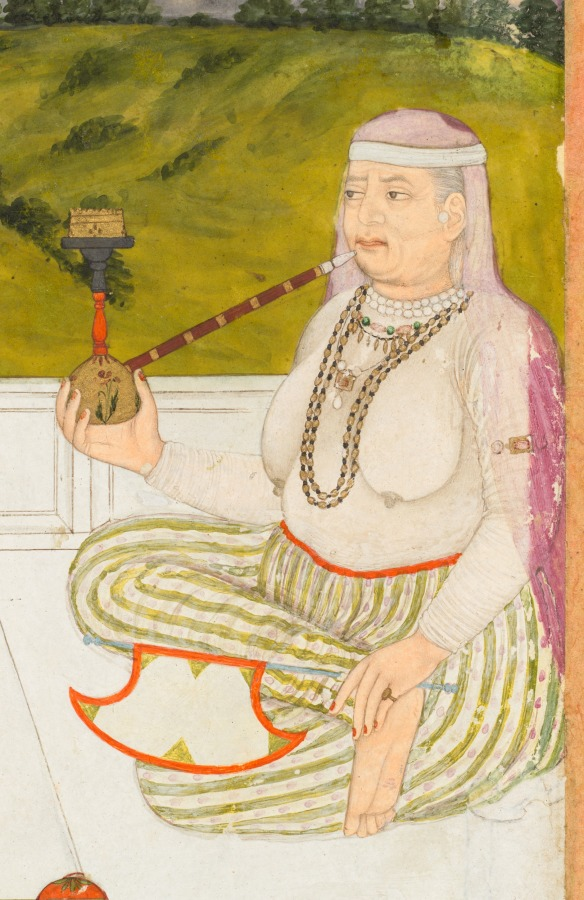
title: A princess reclining on a terrace with attendants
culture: India, Mughal, 18th century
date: c. 1730–1740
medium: Gum tempera and gold on paper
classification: Painting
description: This scene presents an idealized view of the life of a Mughal princess. Bejeweled and dressed in costly garments, she reclines on a couch set up on a white marble terrace. She watches two musicians sing and clap time, and a companion pours for her a cup of liquor. Two attendants stand behind, one waving a whisk to keep away the insects and another holding a box of paan, a betel-leaf preparation for freshening the breath. At the far right an older woman of the harem holds a fan while enjoying a hookah.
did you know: White is the color worn by widows.